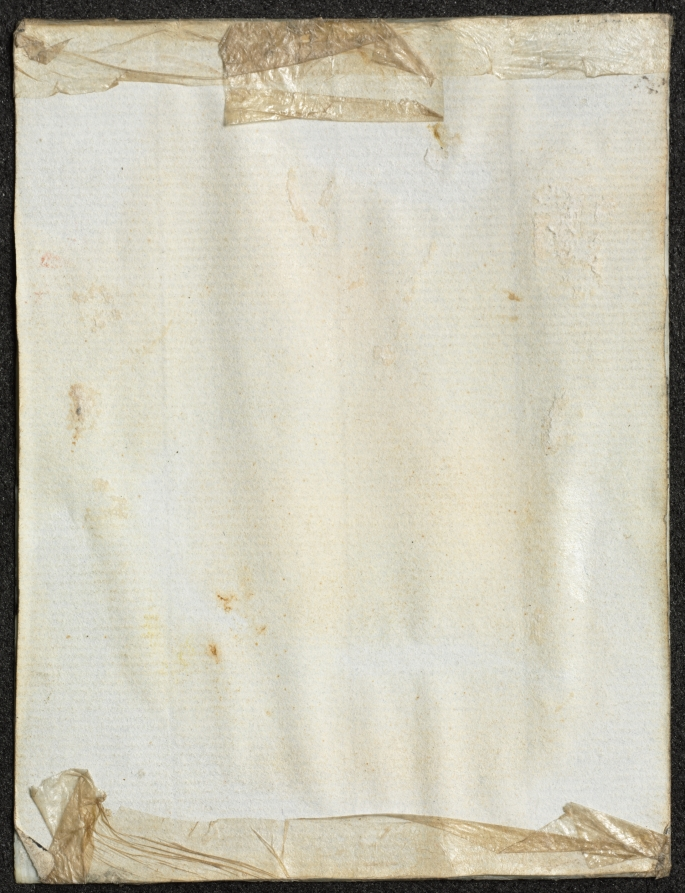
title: Portrait of Anne Law (née Towry), 1st Lady Ellenborough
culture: England, 19th century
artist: John Linnell (British, 1792–1882)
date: c. 1821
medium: watercolor on ivory heightened with gum arabic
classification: Portrait Miniature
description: John Linnell was born and lived much of his young adulthood in Bloomsbury, where his father, James, made picture frames and restored paintings. As a boy the artist trained briefly with Benjamin West (1738–1820) and John Varley (1778–1842) before becoming a student at the Royal Academy from 1805 to 1812. Though primarily known for his landscapes, Linnell was also a prolific portraitist and executed miniatures during the first two decades of his career, learning the medium from his neighbor James Holmes (1770–1860). According to an early biographer, Linnell began painting miniatures around 1818 with a portrait of his wife. By 1823 he had executed a number of miniature commissions from aristocratic patrons, including Princess Sophia, facilitated by the praise of the society maven Lady Stafford. He painted his last known miniature on ivory in 1832. During the approximately fifteen years that the artist painted miniatures, he consistently charged between 10 and 50 guineas for a portrait. These fees corresponded less to the size of the ivory than to the degree of finish and elaboration of the composition. In this portrait Anne Law (née Towry), 1st Lady Ellenborough (c. 1769–1843), is depicted half length. She wears a high-waisted white dress of translucent fabric through which a hint of blue appears and around which she wears a black belt. A devant de corsage (stomacher, or bodice brooch) is worn at her décolletage, extending to the belt. Its gold framework contains at least twelve semiprecious stones colored blue, red, aquamarine, pink, and brown. A gold brooch with a large blue stone is pinned to the cloak at her right shoulder. She also wears a twisted multistrand pearl necklace, matching pearl pendant earrings, and two gold rings on her left ring finger. A dark gray-green shawl with red reverse, gold border, and red fringe is draped over her shoulders and arms. She holds a closed fan in her left hand and stands against a brown background featuring a green and auburn striped curtain in the upper left corner. The sitter’s fair hair is dressed in ringlets that fall at her neck. The miniature is housed in a standing gilt metal and red velvet frame that dates from the same period.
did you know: Lady Ellenborough was described as “so exceedingly lovely, that passengers would linger to watch her watering the flowers—such was the fashion of the day—on the balcony of their house in Bloomsbury Square.”